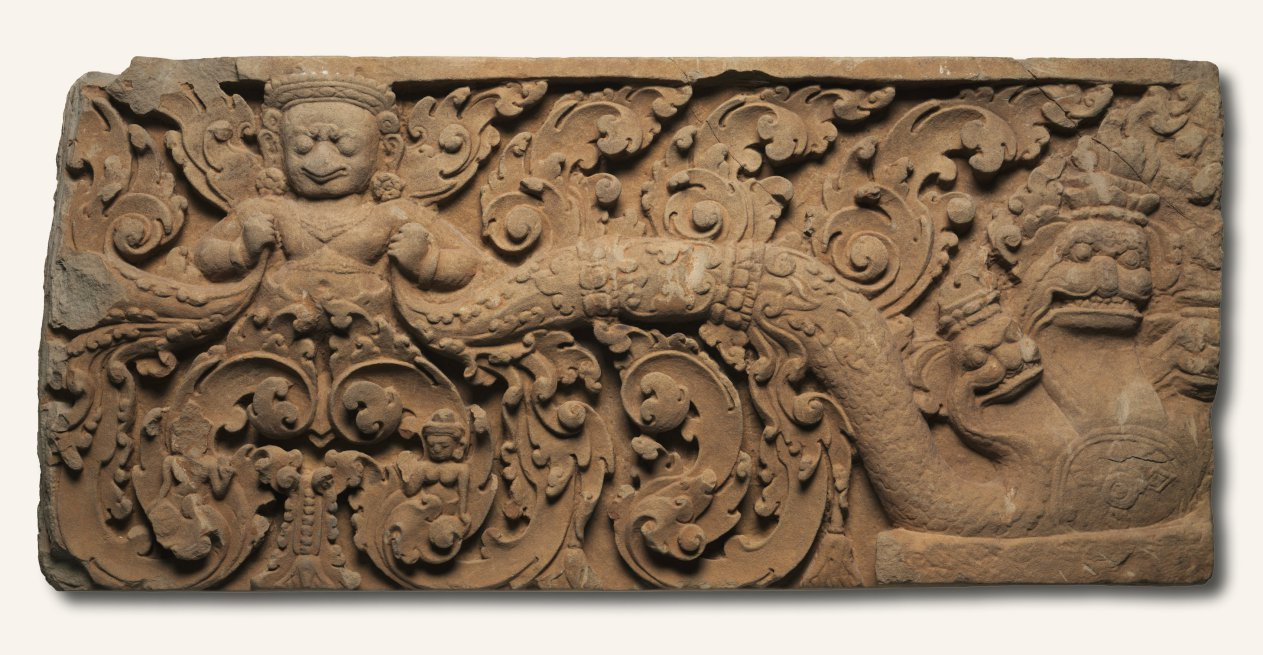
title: Lintel with Garuda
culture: Cambodia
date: 875–925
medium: sandstone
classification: Sculpture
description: Garuda is half man, half eagle, and the mount of Vishnu. His nose is beaklike, and his wings are carved in an exuberant foliate manner, like the swirling leaves that grow from the stem that arches across the middle of the panel. The vegetation yields female figures and jewels before it resolves itself into the heads of a cobra. Garuda is the natural enemy of the serpents, so he holds their tails in check. This decorative lintel is carved in the style of those made for a temple dedicated to the past kings of the Khmer territories. Derived from India’s use of purifying life-affirming imagery around doorways, this Garuda lintel has been rendered in a distinctively Khmer style.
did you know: In the foliage below the Garuda are two tiny female figures, the one on the left badly damaged.